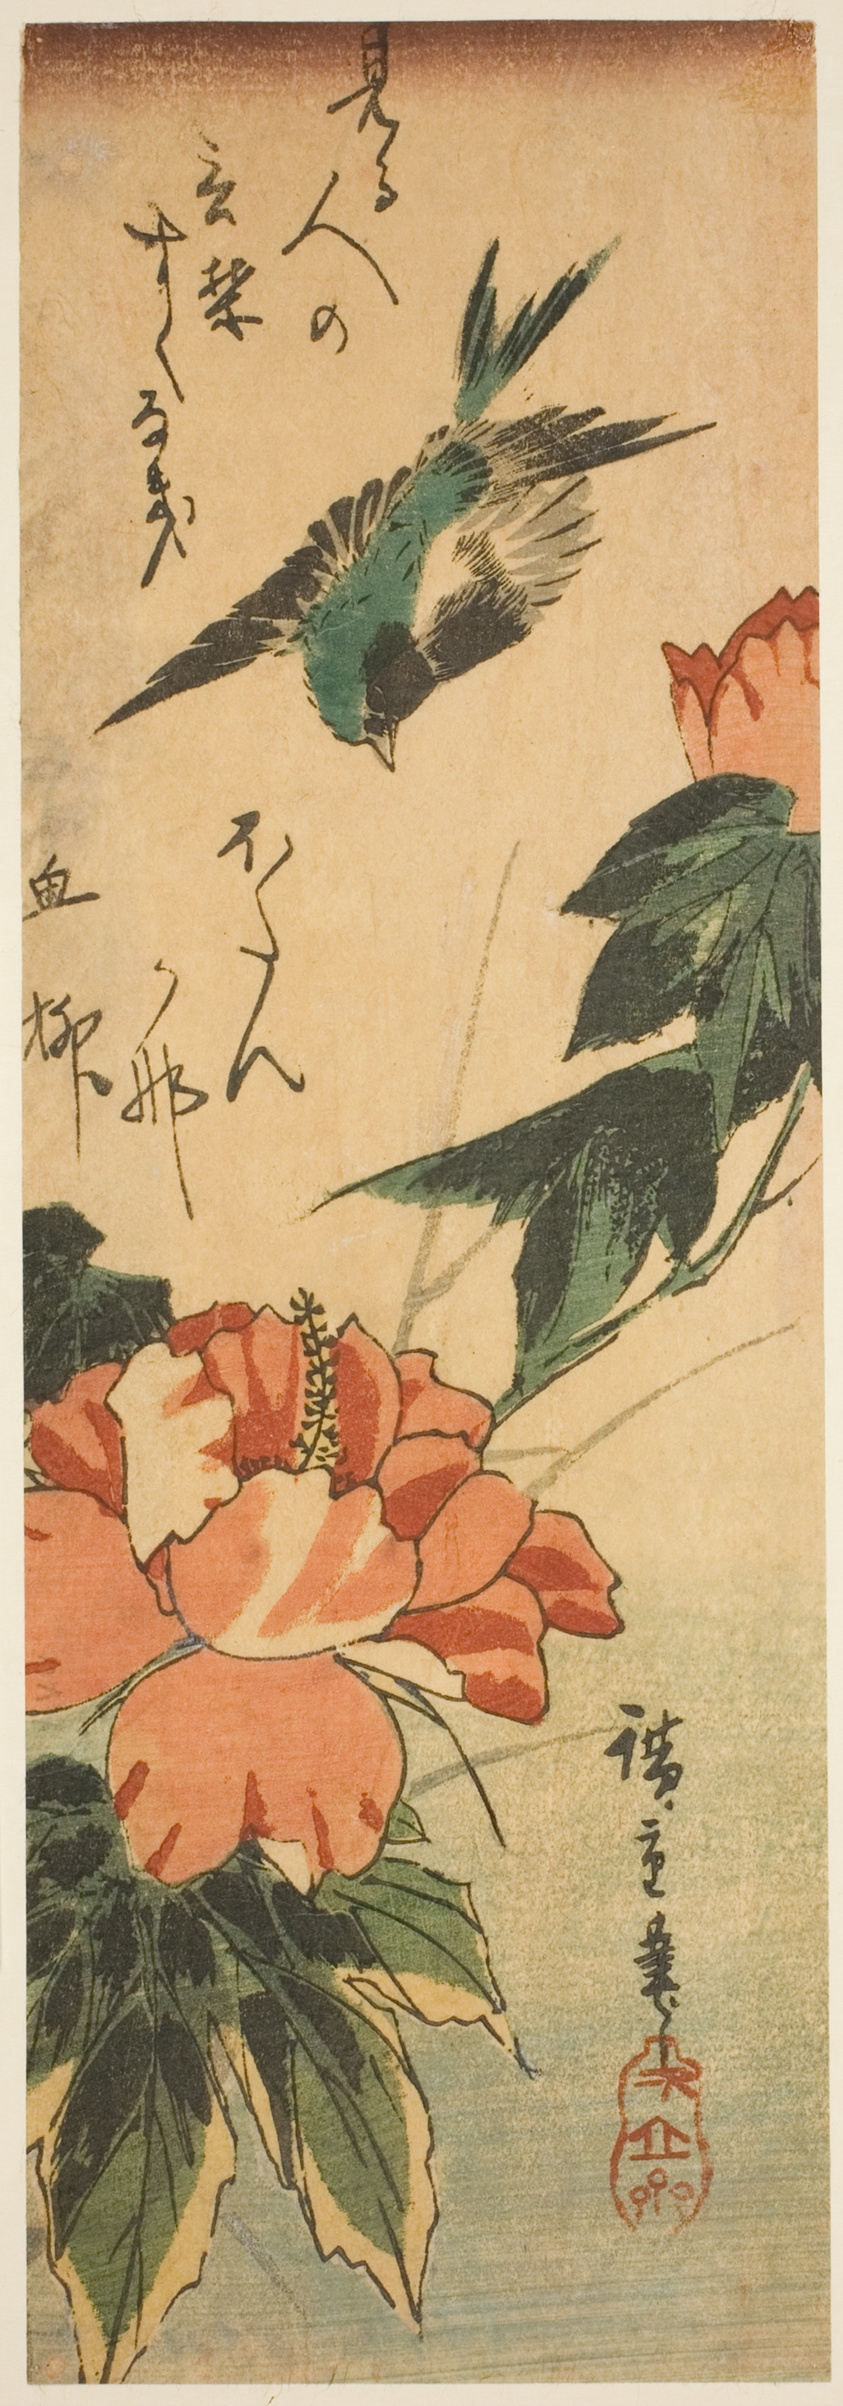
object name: Print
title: Swallow and hibiscus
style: Japanese (culture or style)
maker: Utagawa Hiroshige 歌川 広重; Japanese, 1797-1858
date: c. 1830s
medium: Color woodblock print; aitanzaku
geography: Japan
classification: print; asian art